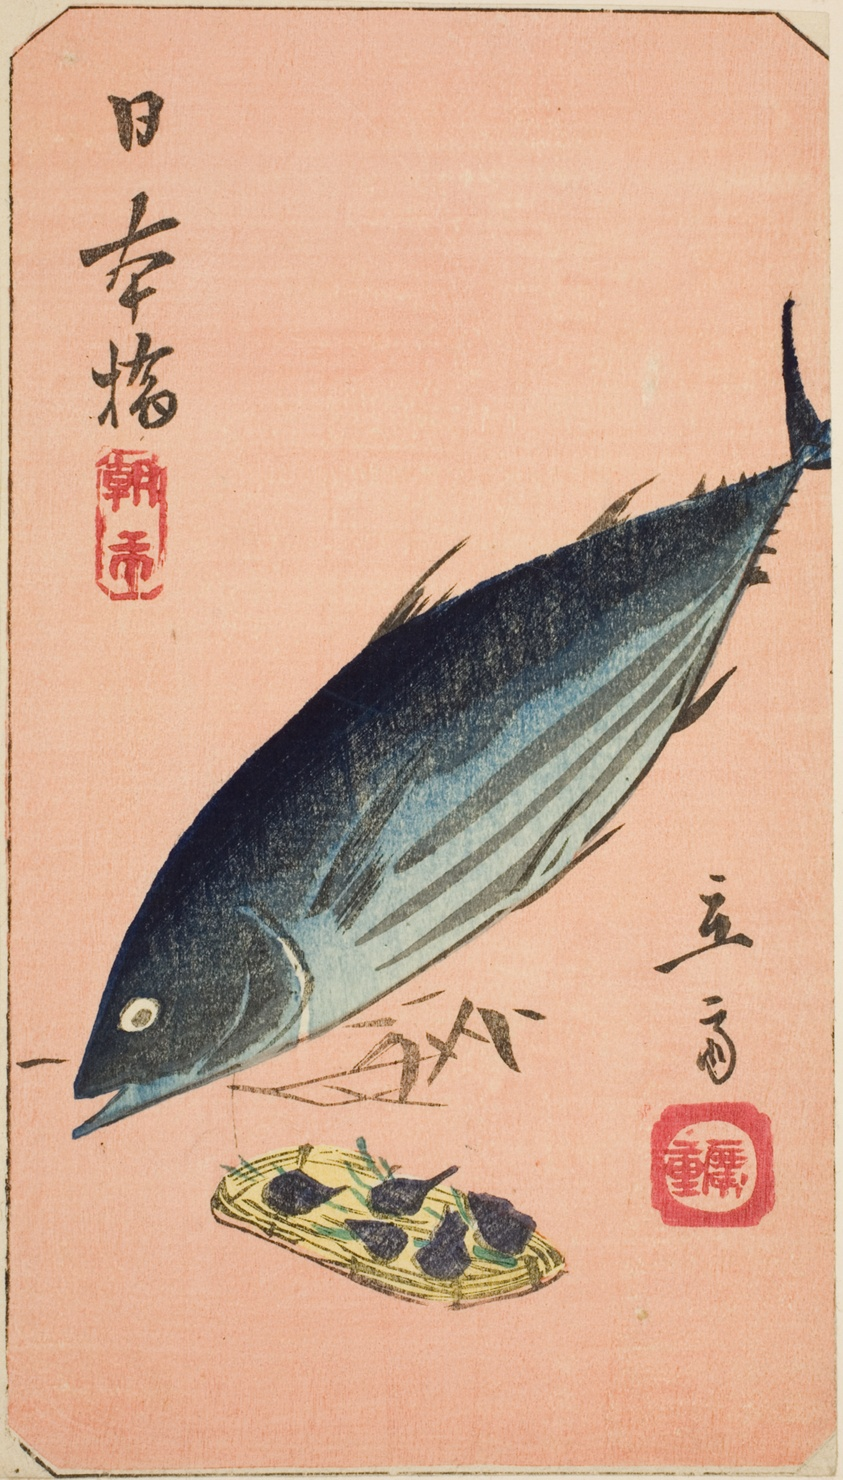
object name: Print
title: Morning Market at Nihon Bridge (Nihonbashi, asaichi), section of a sheet from the series "Cutouts of Famous Places in Edo (Harimaze Koto meisho)"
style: Japanese (culture or style)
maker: Utagawa Hiroshige 歌川 広重; Japanese, 1797-1858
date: 1852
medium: Color woodblock print; section of harimaze sheet (uncut sheet: 1939.1288)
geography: Japan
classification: woodblock print; print; asian art